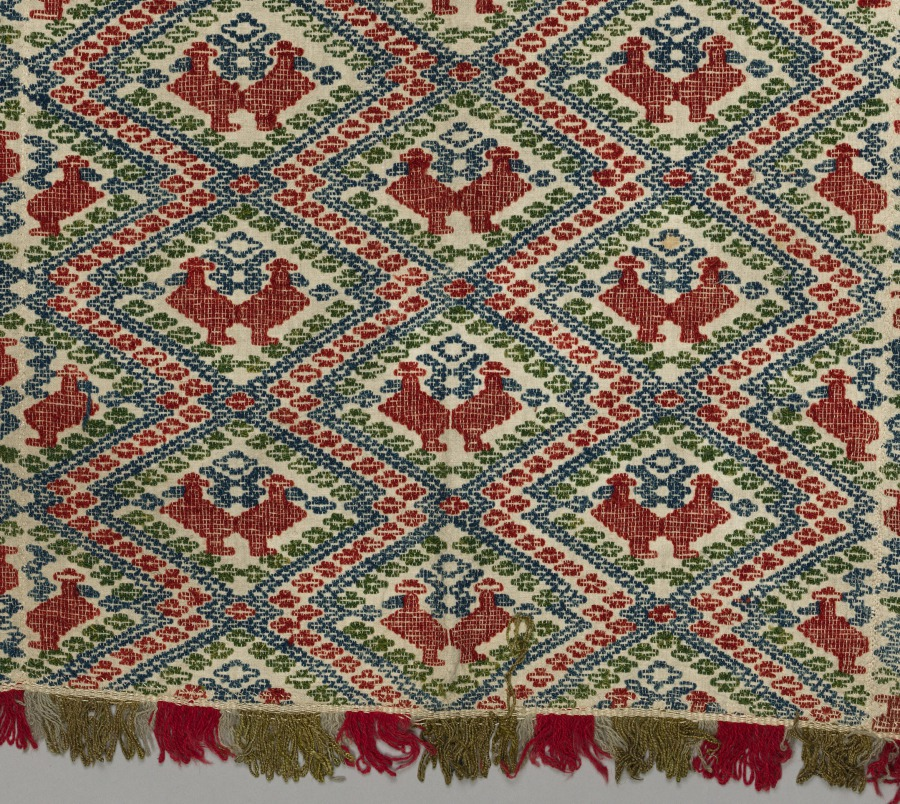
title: Bedspread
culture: Italy, Sicily, 17th-18th century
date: 17th-18th century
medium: linen ornamented with woolen brocading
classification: Textile